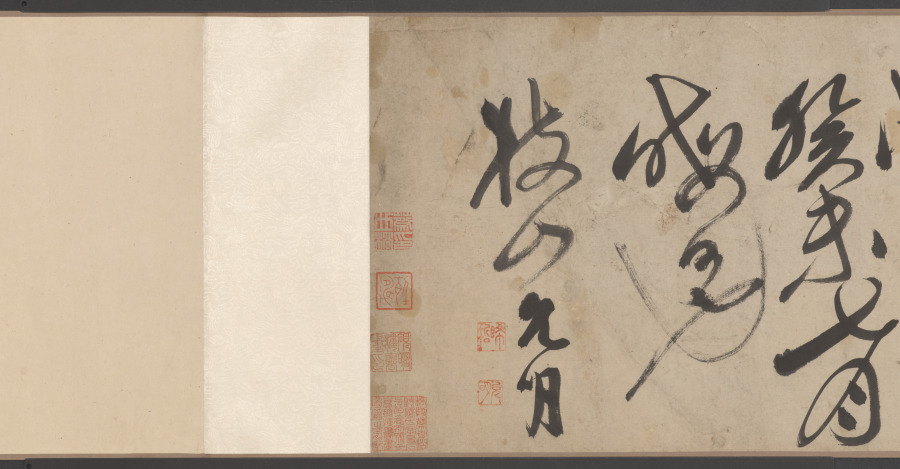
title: Retreat on an Autumn Day, in Cursive Script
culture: China, Ming dynasty (1368–1644)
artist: Zhu Yunming (Chinese, 1460–1527)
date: dated 1523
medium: Handscroll; ink on paper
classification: Calligraphy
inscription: 款識：讌於從一堂，爛漫醉書。癸未（1523）七月晦日也。枝山允明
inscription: 《閒居秋日》逃暑應能蹔閉關，未消多把古賢攀。並拋杯酌方為懶，少事篇章恐礙閑。風墮一庭鄰寺葉，雲開半面隔城山。浮生只說潛居易，隱比求（脫「名」）事更艱。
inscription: 《句曲道中》老至誰憐晝錦明，春來聊得客襟清。宵依星斗宮壇臥，曉（脫「入」）神仙宅舍行。眼看山多城郭少，肩挑詩重簿書輕。何時總入煙霞去。不見人間寵辱驚。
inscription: 《登茆峰》下馬門前一振衣，翠微高迥逼清微。雲端洞裡仙人過，月下山中長史歸。金焰暈牀砂氣伏，紫雲穿竇朮芽肥。神方能詠不能遇，一夜爽靈峰外飛。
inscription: 鈐印：「晞哲」、「允明」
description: This masterwork of calligraphy by Zhu Yunming from Suzhou combines two poems by the artist in cursive script style, characterized by its uninhibited, swift, and intuitive brushwork, so powerful that it here dissolved characters into dots or lines. Written from right to left and top to bottom and alternating in light dry to deep saturated ink, single characters may take a whole column or extend into the next one. Following the movement of the brush, they seem to dance over the paper.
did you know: Zhu Yunming stated that he was in an inebriated state when he created this work.